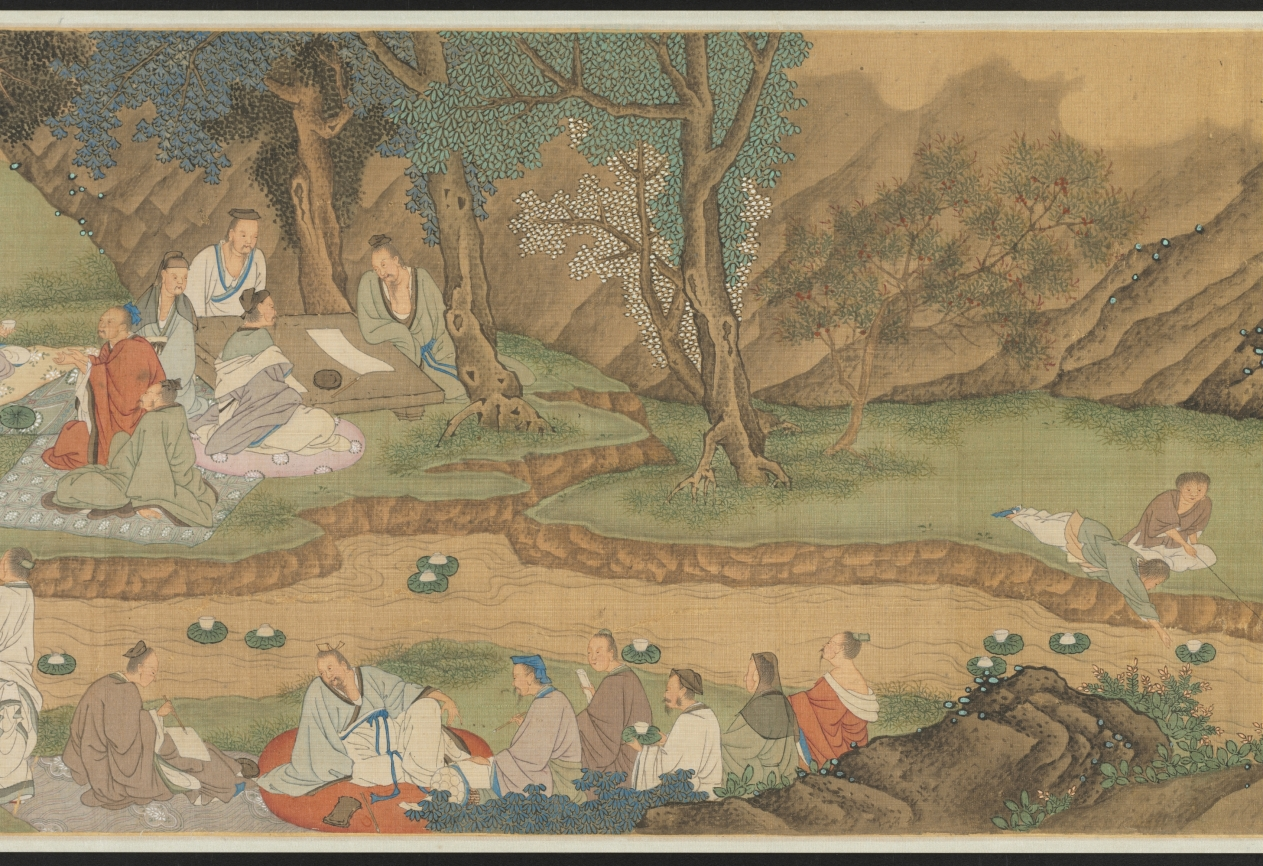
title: Purification at the Orchid Pavilion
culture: China, Qing dynasty (1644-1911)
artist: Fan Yi (Chinese, c. 1615–before 1688)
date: 1671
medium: Handscroll; ink and color on silk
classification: Painting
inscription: Artist's inscription, signature, and 2 seals: Painted by Fan Yi of Zhongfu during the second month of winter of the xinhai year [1671]. [2 seals] Fan Yi zhi yin, Zi yu yi.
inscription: Title on the frontispiece by Monk Yueshan (1629-1709).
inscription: 3 colophons and 13 additional seals: 1 colophon, dated 1707, and 6 seals of Yueshan; 2 colophons and 3 seals of Wong Kwan-Shut (Huang Junshi) 黃君實 (b. 1934); 2 seals of Fu Shen 傅 申 (b. 1937); 2 seals of Tessai Tomioka 富岡鐵齋 (1836-1924).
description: By the 1600s, the historic gathering at Lanting, Zhejiang province, in 353 CE was a common theme in Chinese painting. Originally based on a composition attributed to Li Gonglin (1049– 1106), now lost, Wu school artists revived the theme. Fan Yi, the brother of the artist Fan Qi from Nanjing, used delicate brushwork and luminous colors to depict the spring gathering.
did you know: The gathering’s host is in the Orchid Pavilion at the end of the scroll, representing an episode known as “Wang Xizhi Watching the Geese 王羲之觀鵝圖.”